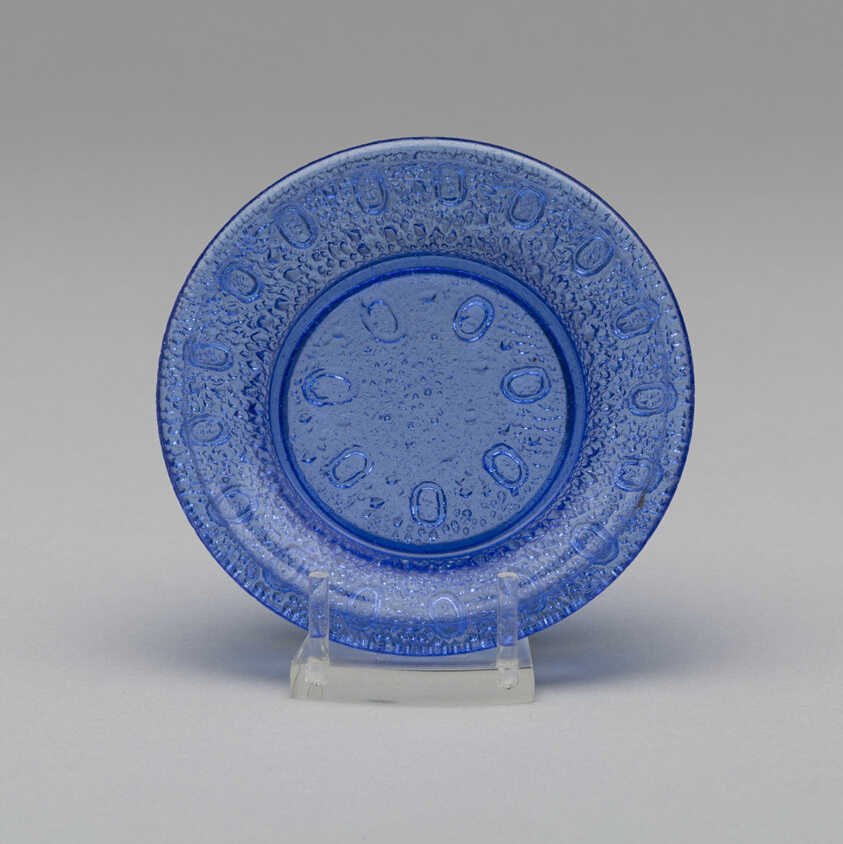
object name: Glass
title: Cup plate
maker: Artist unknown (American, 19th century)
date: 1830–40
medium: Pressed glass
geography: United States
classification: plate (general, dish); glass; american decorative arts; american arts; decorative arts